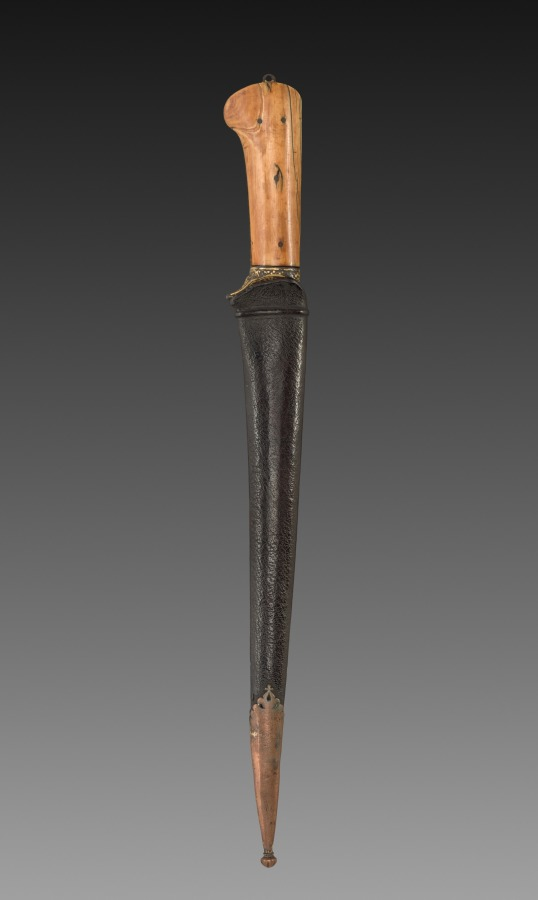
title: Dagger with Brown Leather Case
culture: India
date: 1700s–1800s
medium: silver inlay and leather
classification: Arms and Armor